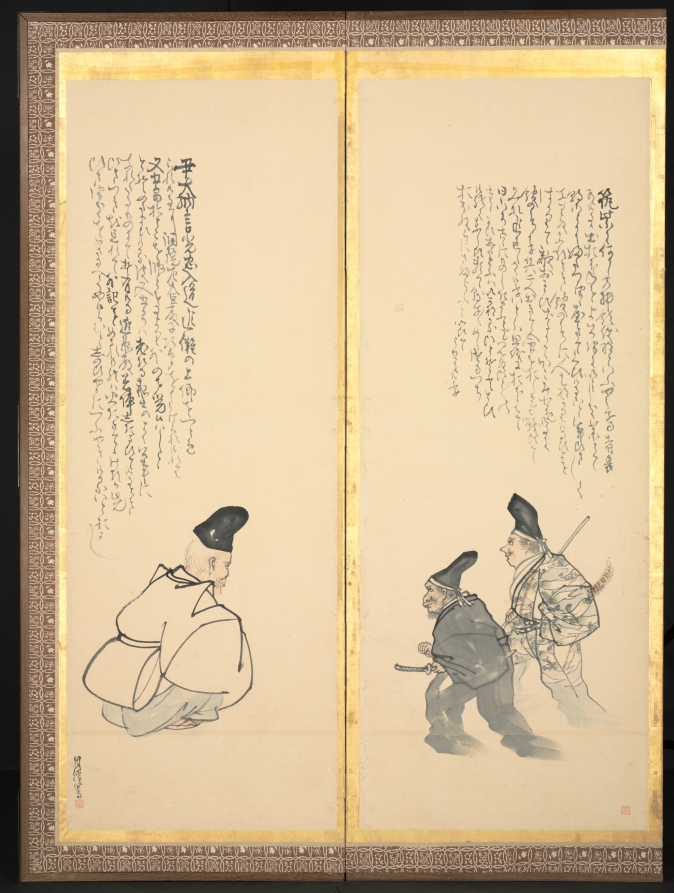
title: Scenes from Essays in Idleness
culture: Japan, Edo period (1615–1868)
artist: Matsumura Goshun (Japanese, 1752–1811)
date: late 1700s–early 1800s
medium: One of a pair of six-panel folding screens; ink and color on paper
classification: Painting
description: Matsumura Goshun inscribed passages from Buddhist monk Yoshida Kenkō’s (1283–1350) well-known collection of anecdotes, Essays in Idleness, across the top of the panels of this screen and its pair. Goshun illustrated the narratives with his vision of the figures who feature in them. The texts cascade down from right to left, forming unique compositional relationships with the images below. The episodes offer a veritable portrait of human idiosyncrasy, from one man’s deep faith in radishes to another’s inability to avoid nicknames.